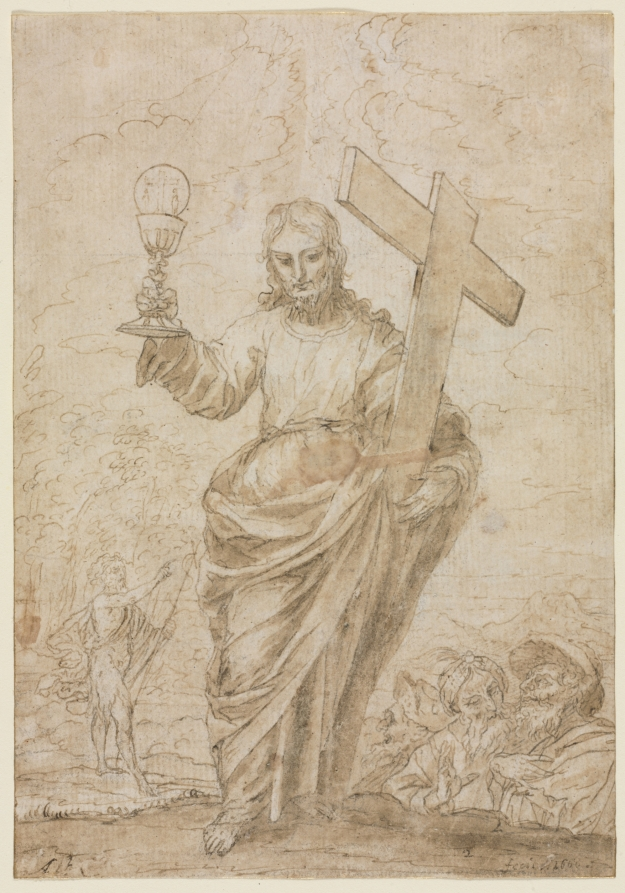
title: Christ Holding a Chalice and Cross (recto); Resurrected Christ and Lamb of God (verso)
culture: Spain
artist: Alonso Cano (Spanish, 1601–1667)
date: 1666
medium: pen and brown ink and brush and brown wash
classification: Drawing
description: In this drawing, a triumphant Christ holds the cross signifying his resurrection while offering a chalice as a symbol of his blood and sacrifice. In the background, Saint John the Baptist points, identifying Christ as the Lamb (or sacrifice) of God. Alonso Cano was an artist in Baroque Spain who made works primarily in the service of the Catholic Church and Spanish monarchs. Though no related painting is known, the composition is appropriate for an altarpiece, meant as a visual aid to clarify the meaning of the Catholic Mass.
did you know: The disk rising above the chalice in Christ's hand represents the eucharistic wafer. Designs were impressed onto these disks of unleavened bread using special wafer irons, some of which have made it into museum collections.